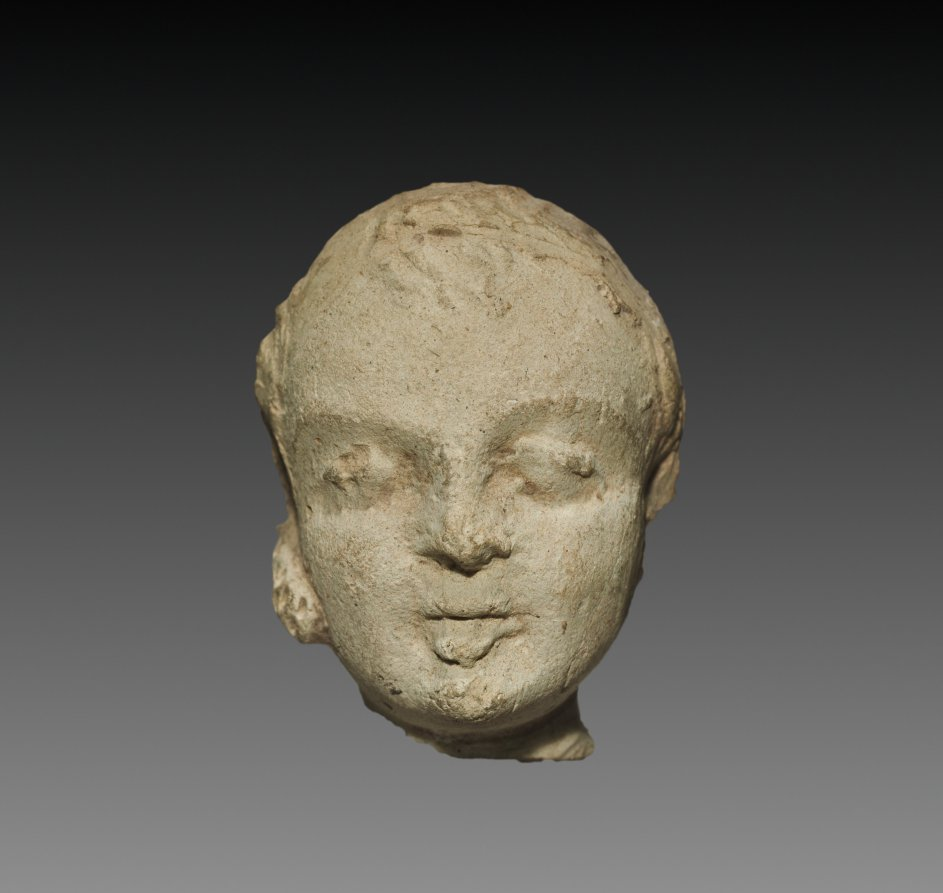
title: Head of a Child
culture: Parthian Empire (247 BCE–224 CE)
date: 1–200 CE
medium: terracotta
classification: Sculpture